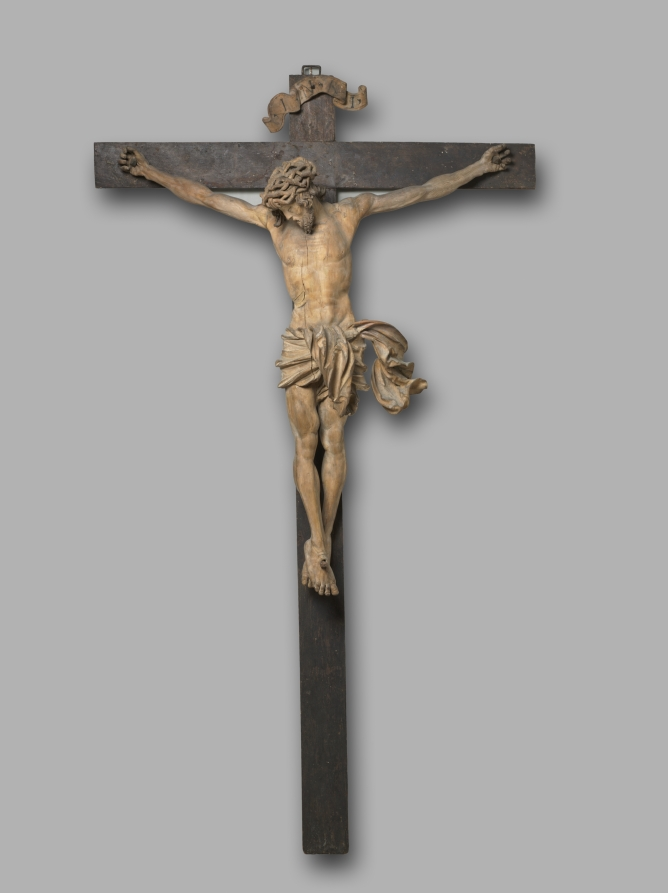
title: Crucified Christ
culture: Germany, Landshut, 16th century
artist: Hans Leinberger (German)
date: c. 1525–1530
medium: lindenwood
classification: Sculpture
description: This sculpture is possibly the best of several crucifixes by this famous sculptor from the Bavarian town of Landshut on the Upper Danube. The pathos and graphic realism with which the artist has modeled the body of Christ ranks this sculpture as one of the artist’s finest works. Leinberger was, along with Matthäus Krennis, an outstanding exponent of the late Gothic style pervasive throughout the Upper Danube area of southeastern Germany during the first decades of the 1500s. This sculpture was probably suspended over the main altar of a church whose origins have not been identified.